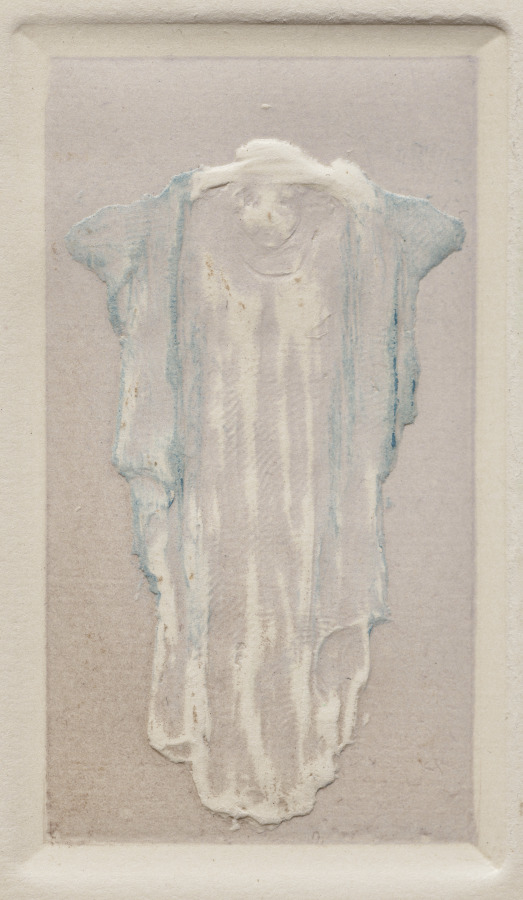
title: Decorative Motif and Standing Woman with Hands on her Head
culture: France, early 20th Century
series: La Loïe Fuller, by Roger Marx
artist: Pierre Roche (French, 1855–1922)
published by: Les Cents Bibliophiles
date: 1904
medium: gypsograph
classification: Bound Volume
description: Although best known as a sculptor, Roche was a versatile and prolific artist who worked in many mediums. Loïe Fuller, the pioneer of modern dance who took Paris by storm in 1892, was one of his favorite subjects. He portrayed her in clay, bronze, marble, plaster, and in a series of gypsographs that illustrated an essay by the art critic Roger Marx. The book was described as "a precious monument to Loïe Fuller."